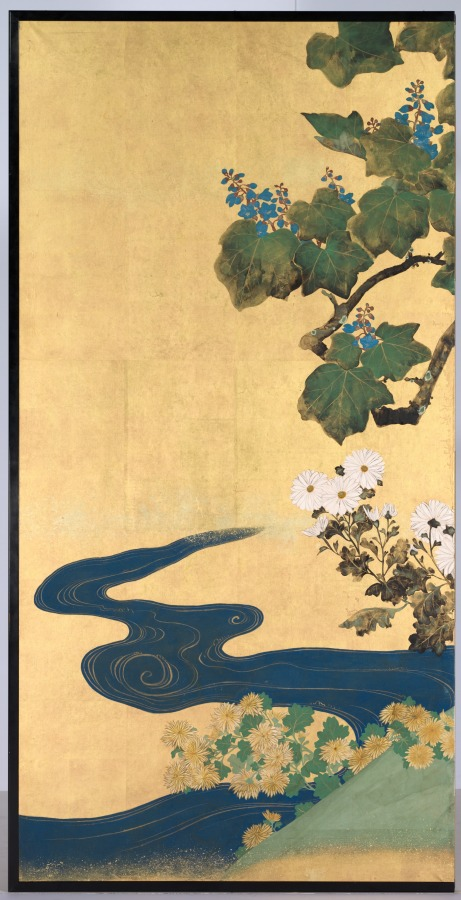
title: Paulownias and Chrysanthemums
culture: Japan, Edo period (1615–1868)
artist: Sakai Hōitsu (Japanese, 1761–1828)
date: early 1800s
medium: Two-panel folding screen; ink and color on gilded paper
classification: Painting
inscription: inscription at right reads: "Hoitsu hitsu" (painted by Hoitsu); within circle: (Hoitsu); tiny gourd shape below encloses two characters "Bun-zen," Hoitsu's name.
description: In this screen, Sakai Hōitsu expertly deployed a painting technique called “dripping-in” (tarashikomi). Ink and color dripped on the surface, and allowed to pool there, created the illusionistic effect of lichen-dotted tree bark and twisted chrysanthemum leaves. Paulownia and chrysanthemum are signifiers of late spring and early autumn as well as emblems of the Japanese imperial house. Paulownia also has medicinal properties and associations with fortitude, while chrysanthemum symbolizes good government.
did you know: Hōitsu often painted two-panel folding screens for urban clients residing in smaller spaces. A painting after this one in the Itabashi Museum in Tokyo shows an extended composition across a pair of two-panel screens.